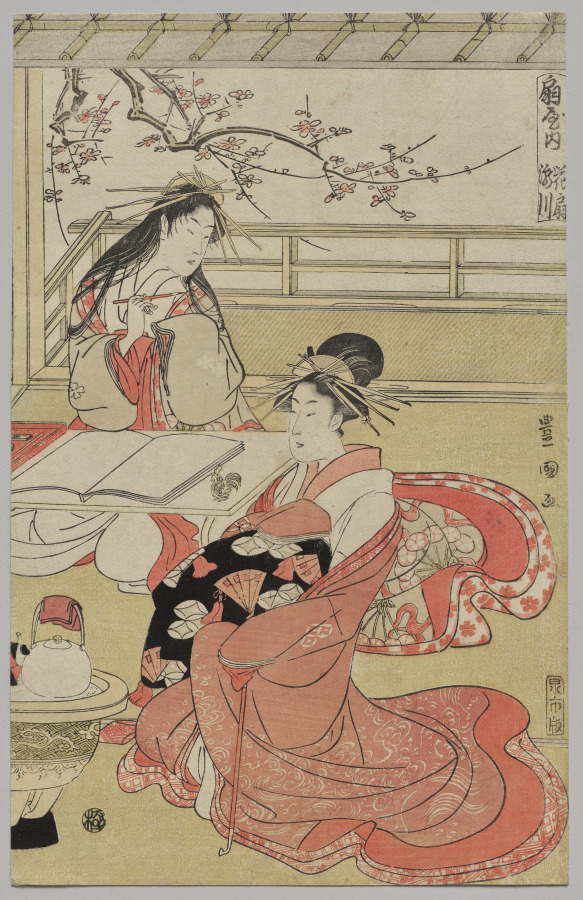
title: Courtesans of the Ōgiya on a Spring Outing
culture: Japan, Edo period (1615–1868)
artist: Utagawa Toyokuni (Japanese, 1769–1825)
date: mid- or late 1790s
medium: One of a triptych of woodblock prints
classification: Print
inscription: Signature: Toyokuni ga Publisher: Izumiya Ichibei (Senichi han) Censorship Seal: kiwame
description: In these prints, two courtesans of the Ōgiya brothel are entering an open pavilion, while another group gathers around a Japanese hibachi inside. Hanaōgi, the most celebrated courtesan of Ōgiya in the late 1700s, is depicted at a desk. Holding a brush in her hand, she turns her head to one side as if gathering her thoughts before writing in the book before her. Both her position and her loosened hair separate Hanaōgi from her courtesan companions who wear elaborate coiffures. This depiction of her captures both her knowledge of poetry and her skill as a calligrapher.